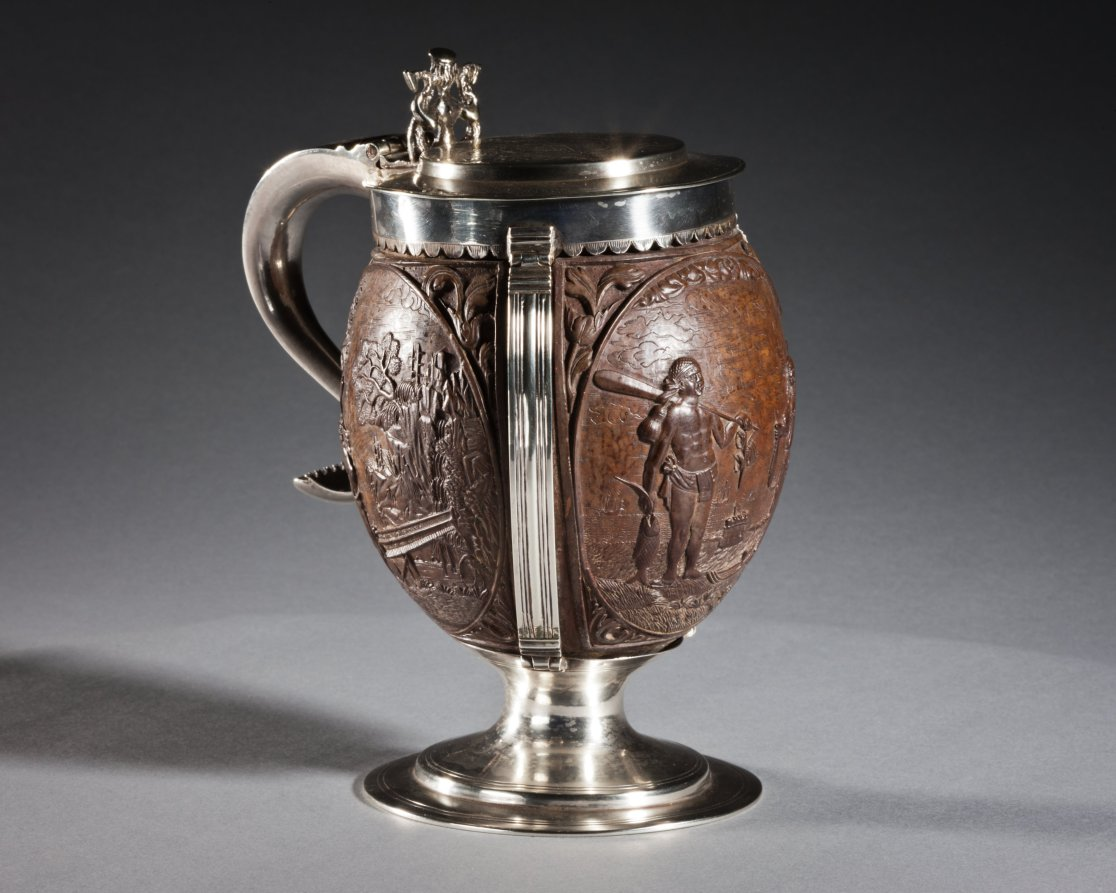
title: Coconut Cup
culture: carved coconut, probably The Netherlands; silver mount, probably England, 17th century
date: c. 1630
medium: carved coconut in silver mount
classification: Metalwork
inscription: top lid has engraved coat-of-arms, underside of lid has inscription: George Lewis TIVERTON Feby, 1st 1760.